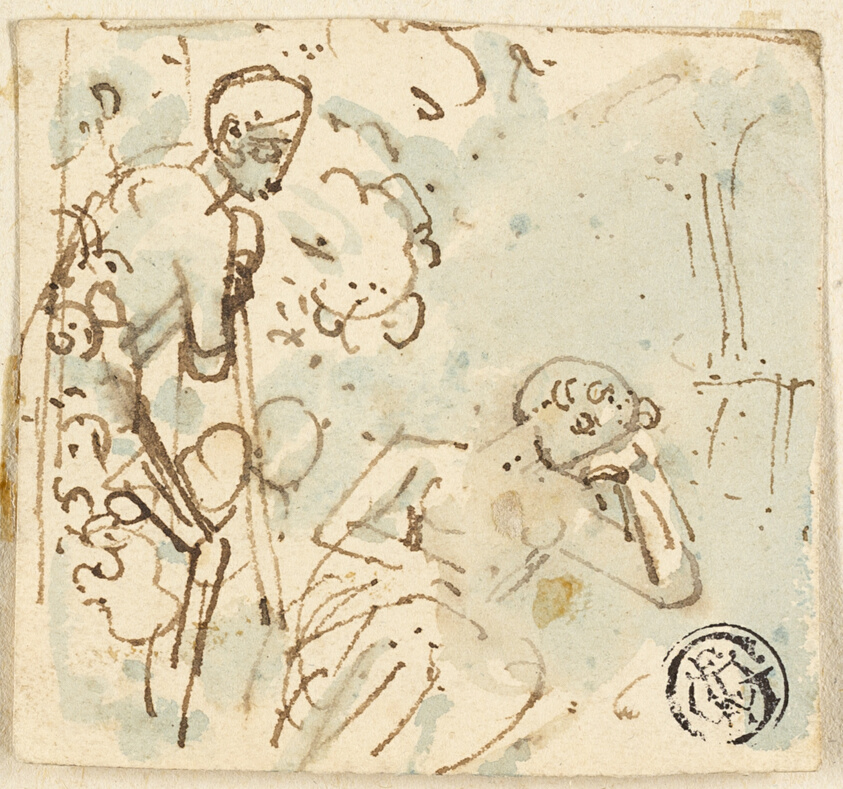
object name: Drawing and Watercolor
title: Sketch of Man Leaning on Staff, Looking at Sleeping Woman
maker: Attributed to Thomas Stothard; English, 1755-1834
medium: Pen and brown ink with brush and blue wash, on cream wove paper, tipped onto cream wove paper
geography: England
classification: pen and ink drawings; drawings (visual works); prints and drawing